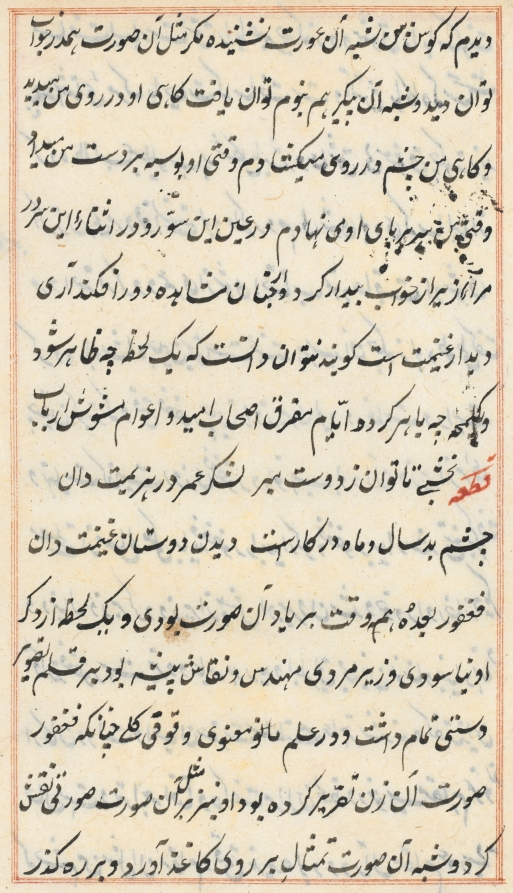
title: Page from Tales of a Parrot (Tuti-nama): text page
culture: Mughal India, court of Akbar (reigned 1556–1605)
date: c. 1560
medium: gum tempera, ink, and gold on paper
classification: Painting